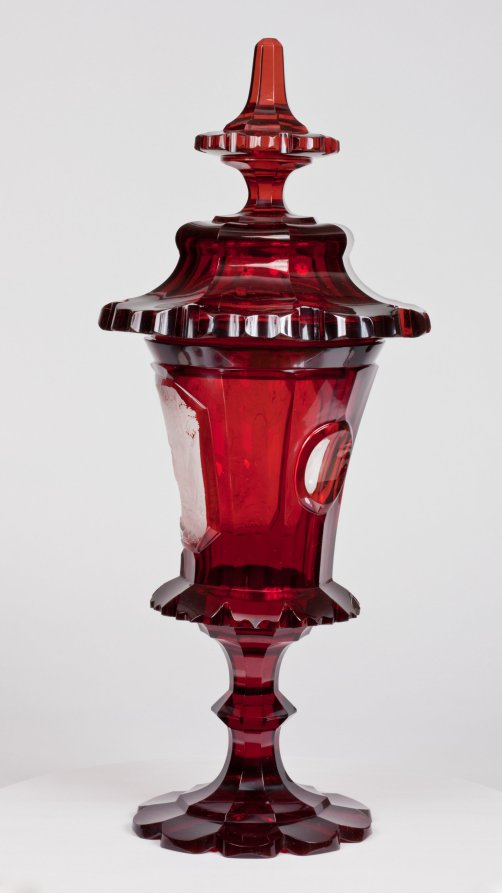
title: Covered Cup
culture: Bohemia, 19th century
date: mid-1800s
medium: ruby glass with engraved decoration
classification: Glass